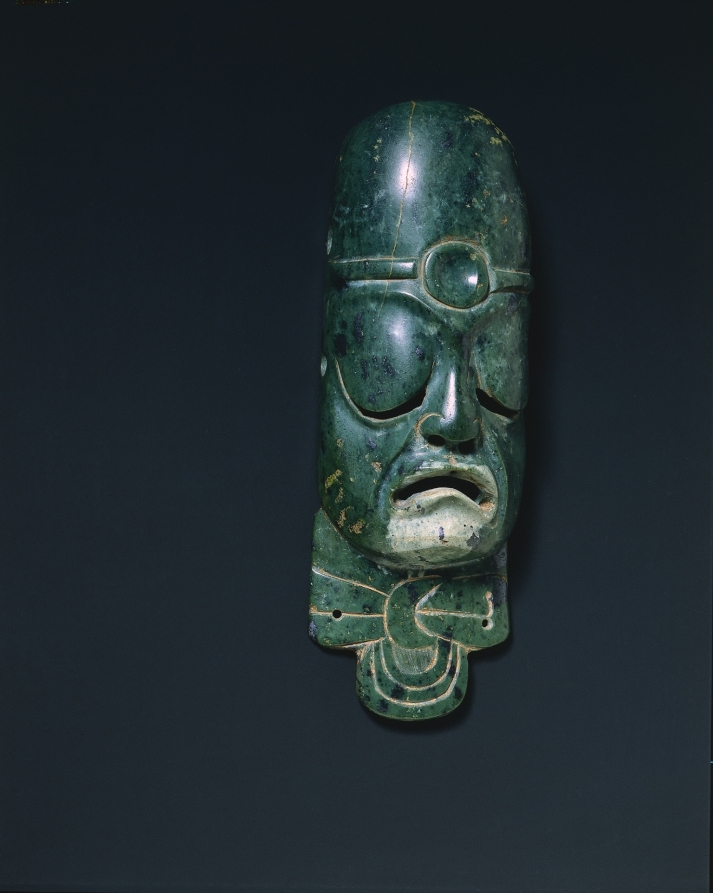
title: Elongated Mask Ornament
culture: Mesoamerica, Mexico, Olmec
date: c. 900–300 BCE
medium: greenstone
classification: Sculpture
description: Small masks made of precious media-especially greenstone, which Mesoamerican people valued above most other materials-likely served as elements of Olmec elite regalia. Such masks commonly depict human faces, although it is unclear whether the creature shown on this unusual example is human or supernatural. It may be a late work.